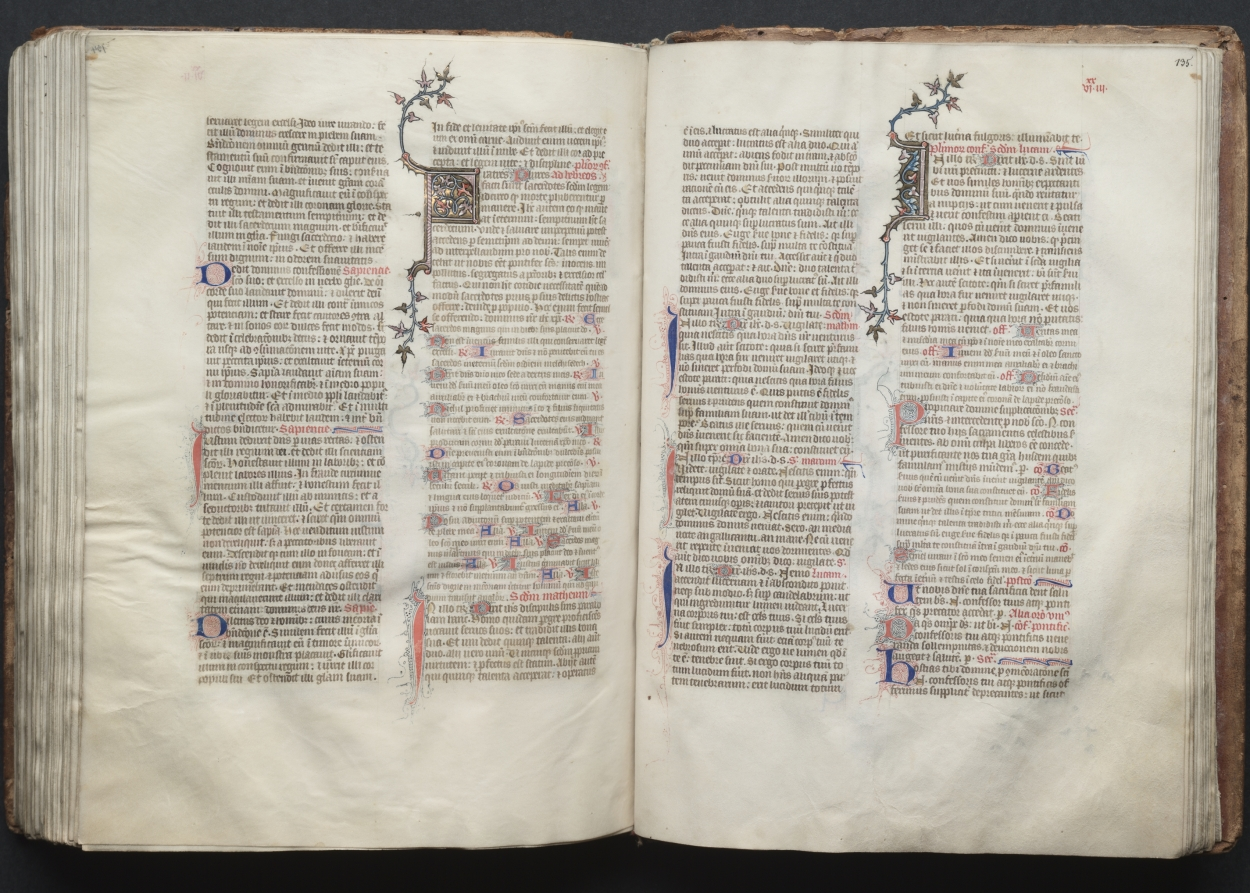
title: The Gotha Missal: Fol. 134v, Text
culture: France, Paris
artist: Master of the Boqueteaux (French)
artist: and Workshop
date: c. 1375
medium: ink, tempera, and gold on vellum; blind-tooled leather binding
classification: Bound Volume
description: The style and quality of this manuscript's decoration is typical of deluxe Parisian books made for aristocratic or royal patrons. Most of the book's decoration appears to be the work of the Master of the Boqueteaux, an artist active at the court of King Charles V (died 1380). His style was apparently shared by a number of book illuminators working in and around Paris. It is very possible that the Gotha Missal belonged to Charles V, but is not provable because the manuscript has no royal portraits and lacks a colophon. Given the book's magnificent decoration, however, it would seem that it was produced for a Valois prince, if not for the king himself. The manuscript receives its name from the German dukes of Gotha, its later owners.